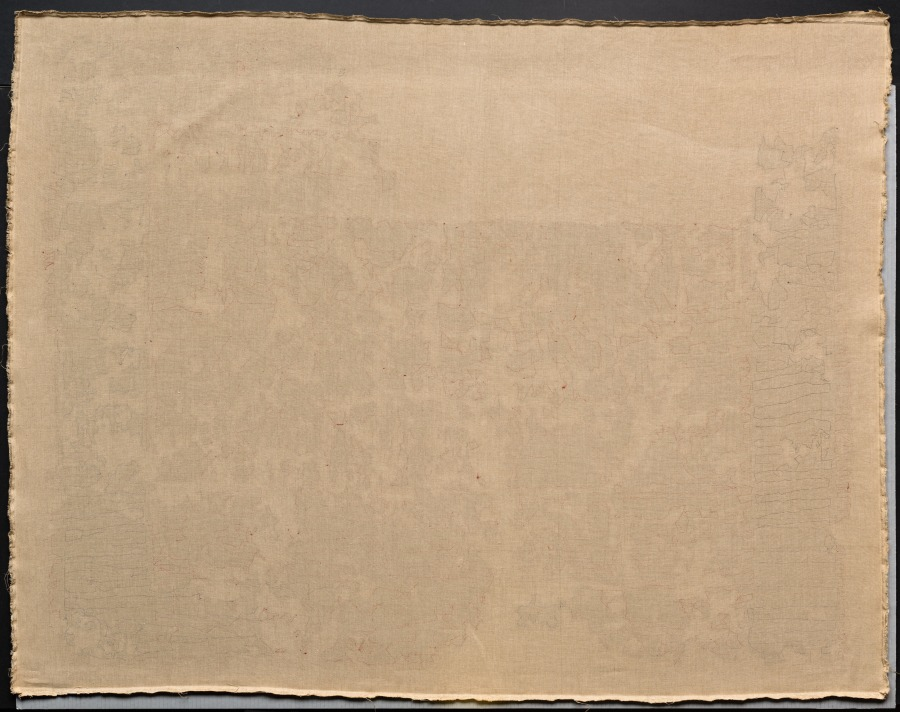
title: Fragment of a Large Hanging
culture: Egypt, Antinoë, Byzantine period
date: 500s CE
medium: tapestry weave (with plain tabby borders): wool and linen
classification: Textile